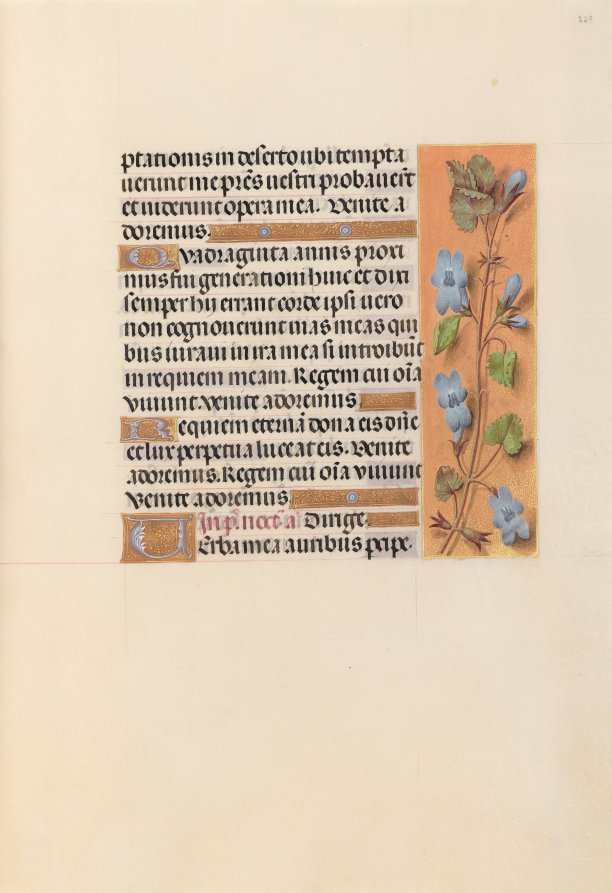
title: Hours of Queen Isabella the Catholic, Queen of Spain: Fol. 227r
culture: Flanders, Ghent and Bruges, late 15th century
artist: Master of the First Prayerbook of Maximillian (Flemish, c. 1444–1519)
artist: and Associates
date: c. 1500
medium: ink, tempera, and gold on vellum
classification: Bound Volume